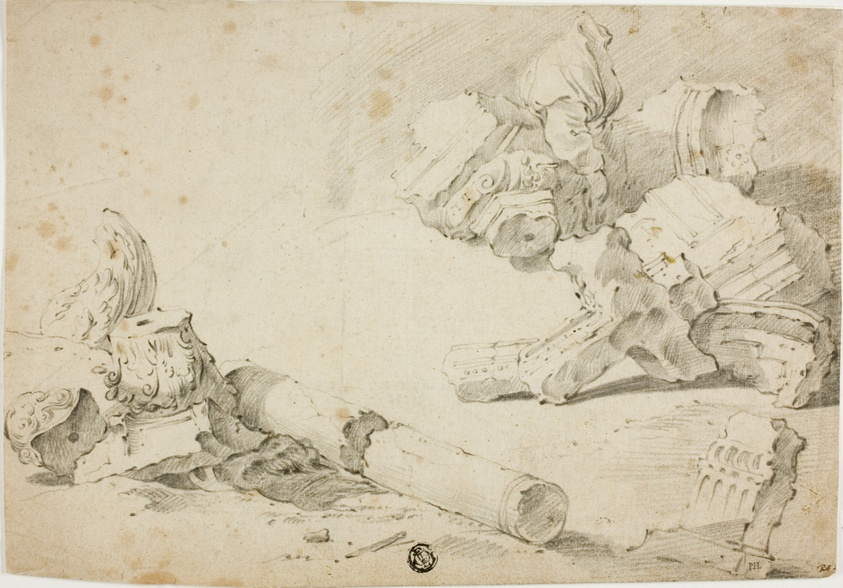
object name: Drawing and Watercolor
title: Architectural Fragments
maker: Unknown Artist; Dutch, 17th/18th century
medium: Charcoal and graphite, on ivory laid paper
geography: Netherlands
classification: graphite; drawings (visual works); prints and drawing